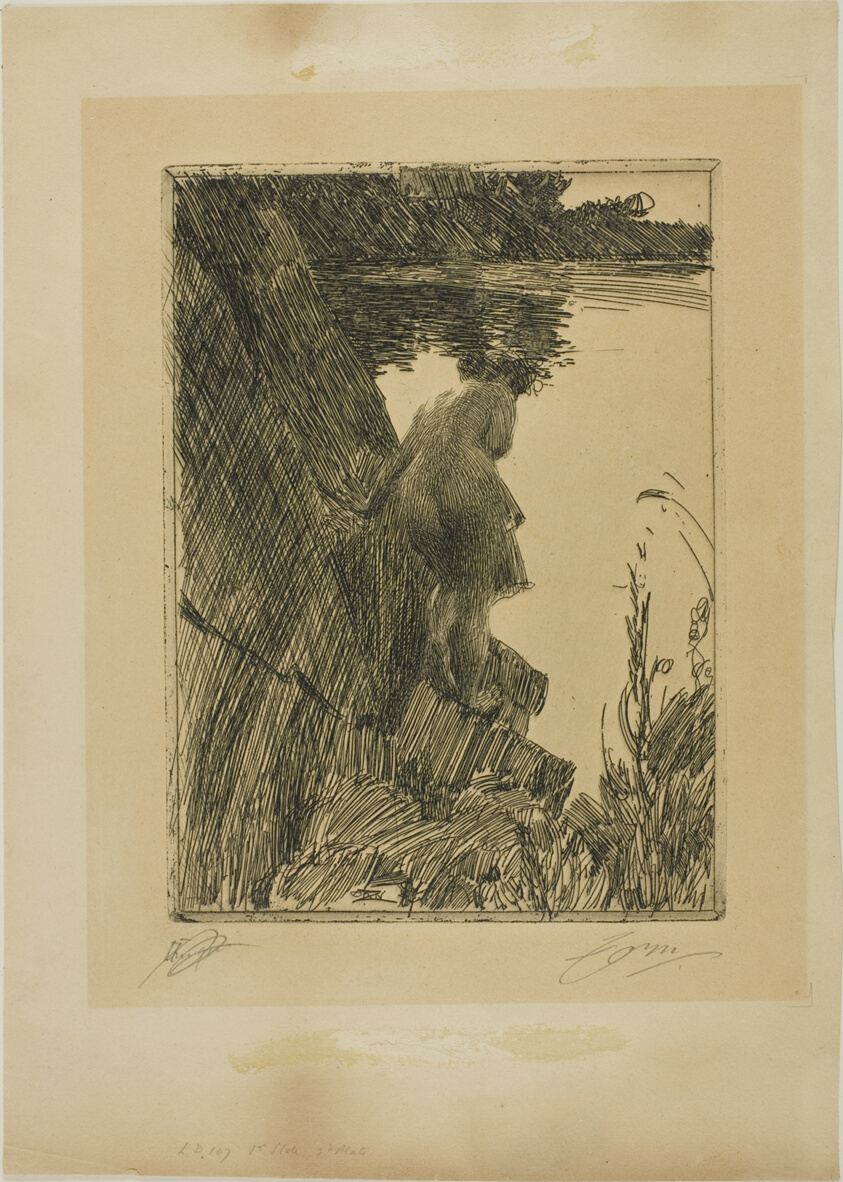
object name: Print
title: Bather (Evening) II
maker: Anders Zorn (Swedish, 1860-1920)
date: 1896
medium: Etching on tan wove paper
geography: Sweden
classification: etching; print; prints and drawing